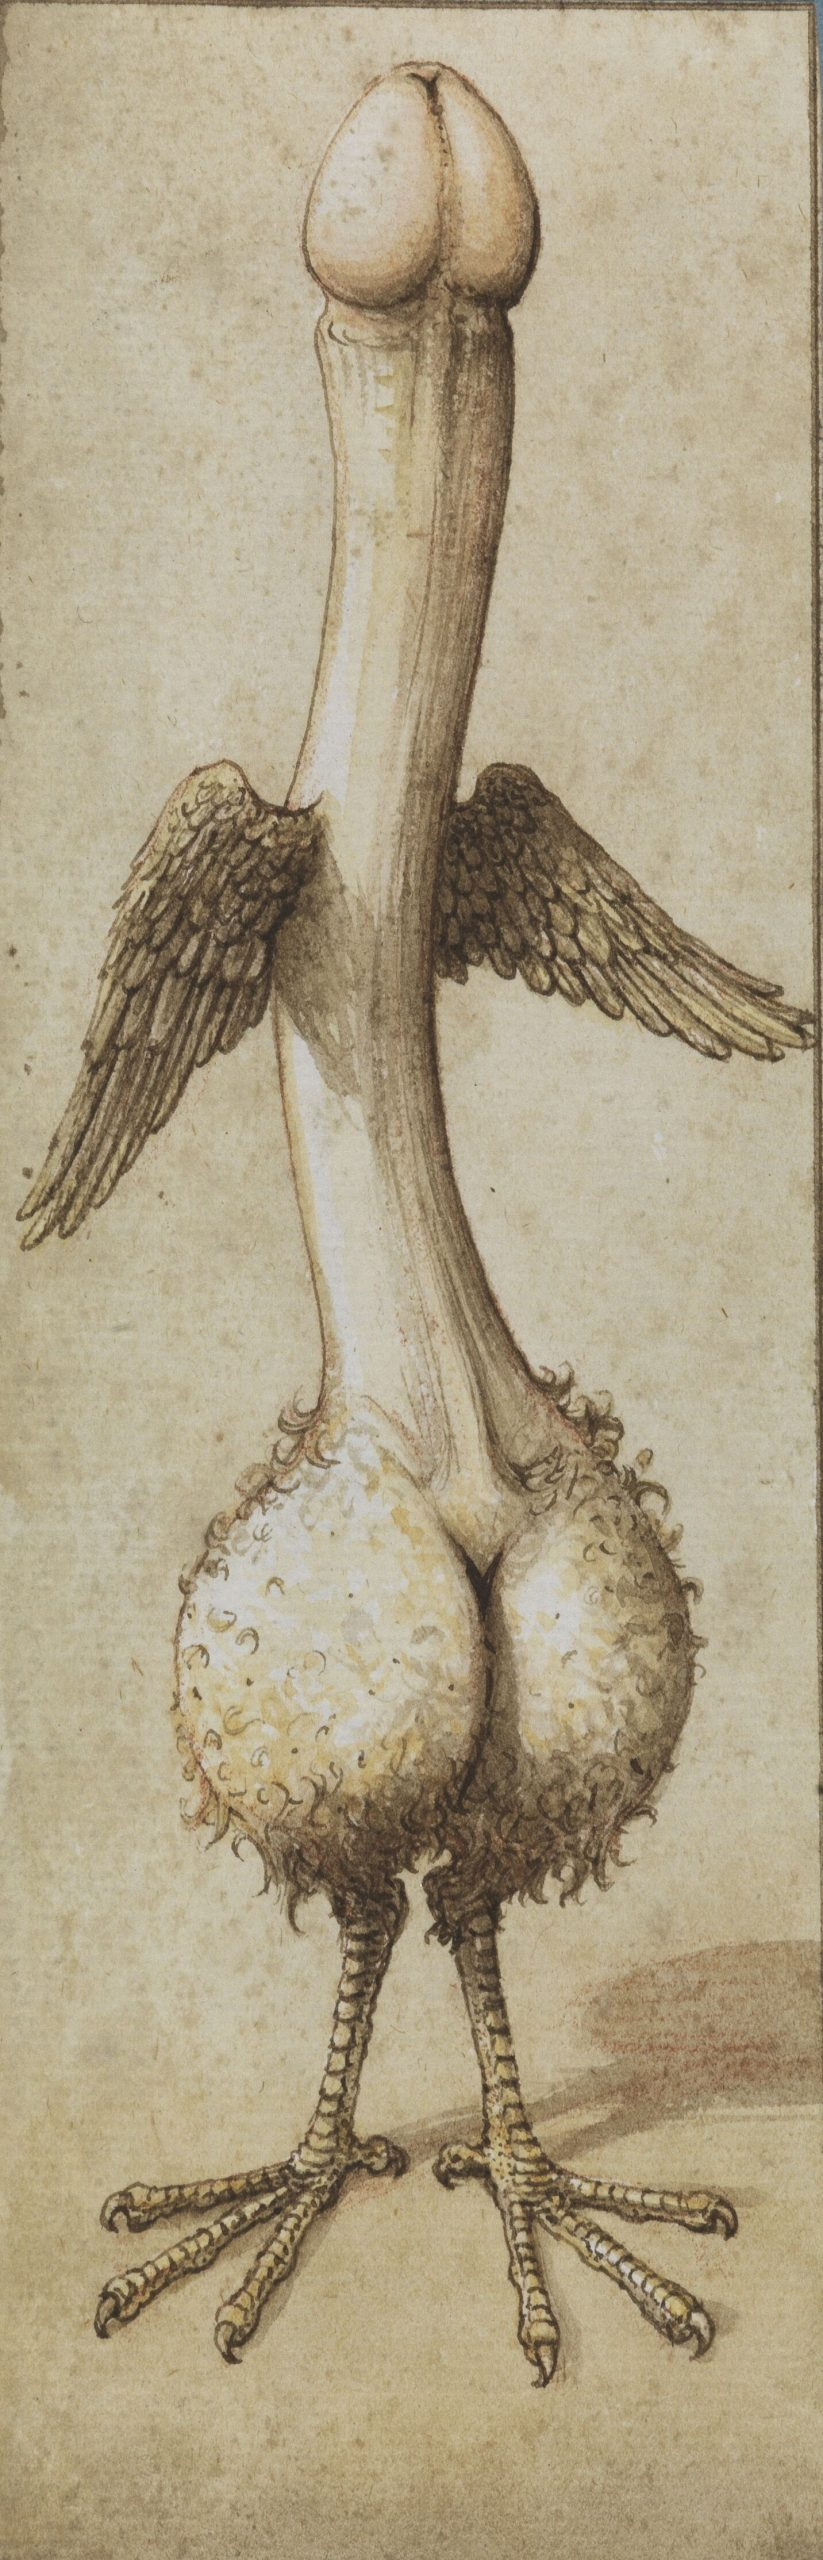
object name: Drawing and Watercolor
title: A Winged Phallus in the Shape of a Bird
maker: Unknown North Italian Artist; Italian, 16th century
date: second half of the 16th century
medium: Pen and brown ink and brush and brown ink wash, with opaque watercolor and traces of red chalk, on cream laid paper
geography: Italy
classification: prints and drawing; brush and wash; drawing; paper; pen and ink drawings